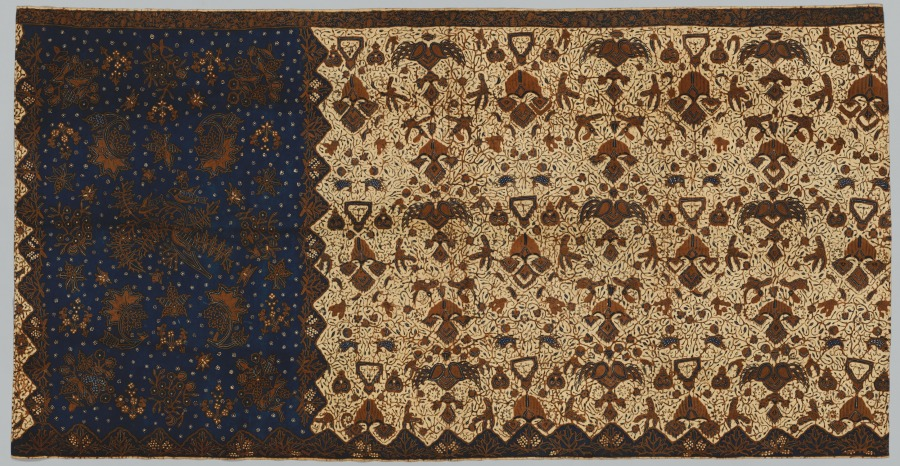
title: Wearing Cloth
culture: Indonesia, Central Java, 19th century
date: 1800s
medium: batik; cotton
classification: Textile